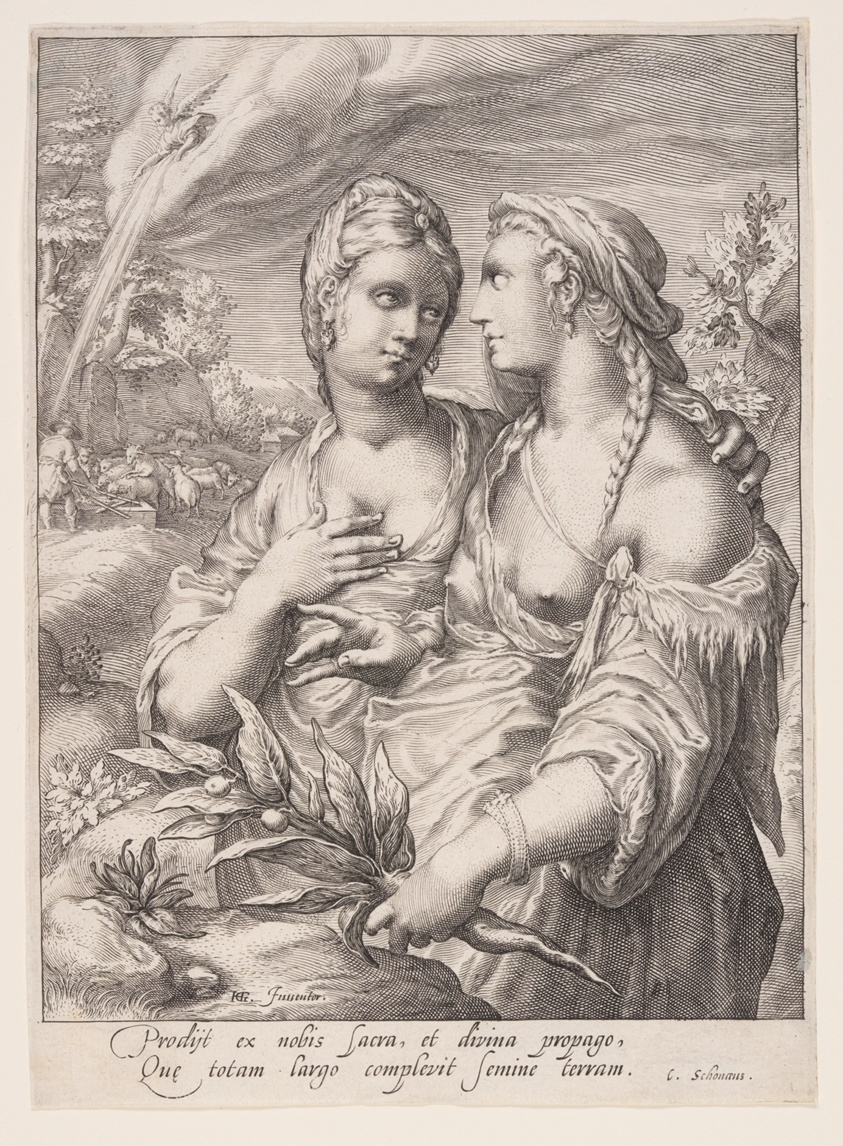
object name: Print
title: Lea and Rachel, from The Wives of the Patriarchs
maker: Jacob Matham (Dutch, 1571–1631); after Hendrick Goltzius (Dutch, 1558–1617)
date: 1597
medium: Engraving on laid paper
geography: Netherlands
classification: print; engraving; paper; prints and drawing